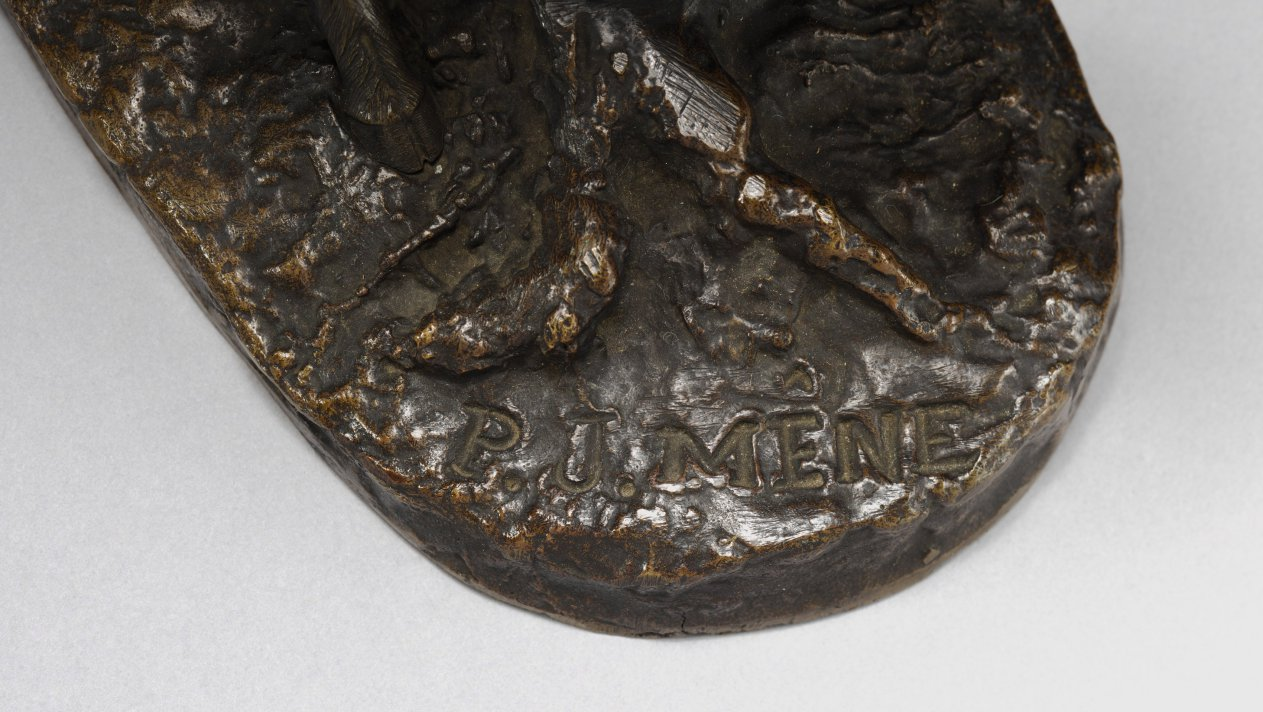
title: Stag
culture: France, 19th century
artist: Pierre Jules Mène (French, 1810–1879)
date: c. 1825 – 1879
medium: bronze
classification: Sculpture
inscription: Signed: "P. J. Mene"